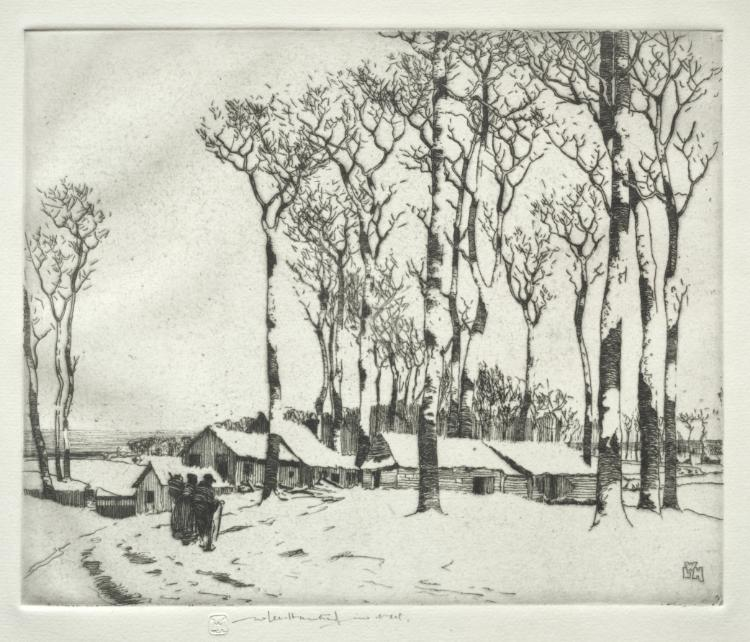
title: Sur la Neige (Harold Wood, near Romford)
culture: England, 20th century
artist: William Lee Hankey (British, 1869–1952)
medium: etching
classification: Print